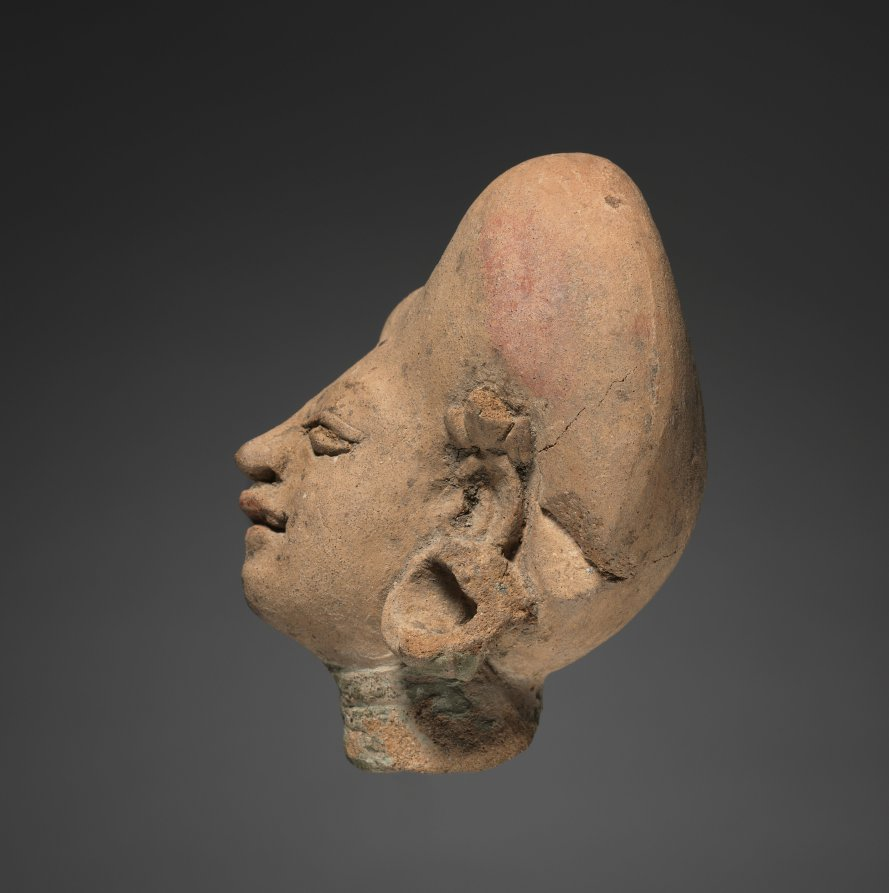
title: Female Head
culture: Eastern Java, Majapahit Dynasty (1293-1478)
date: Majapahit Dynasty (1293–1478)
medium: terracotta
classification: Sculpture